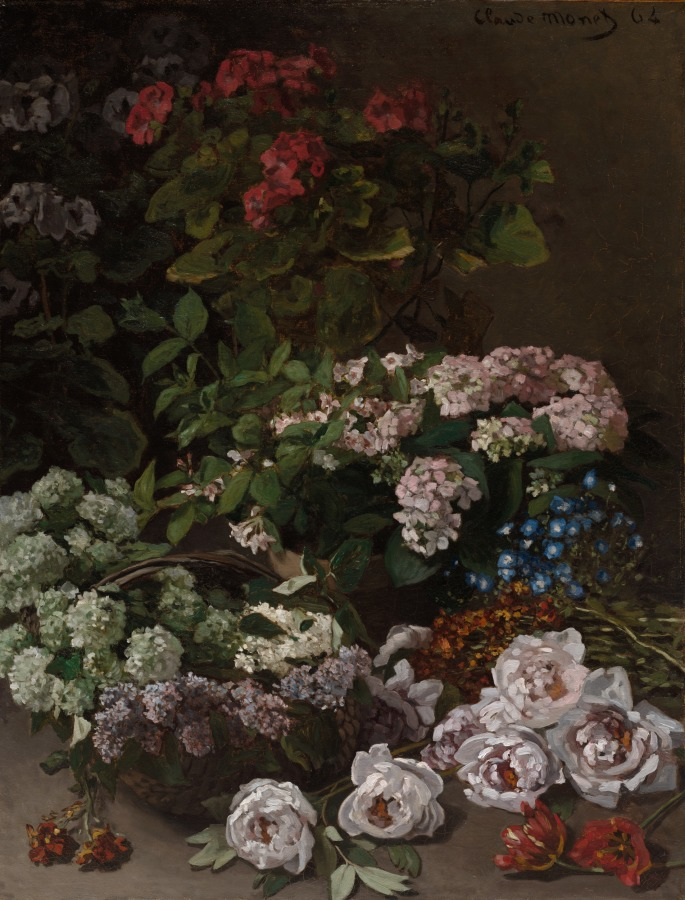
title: Spring Flowers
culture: France, 19th century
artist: Claude Monet (French, 1840–1926)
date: 1864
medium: oil on fabric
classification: Painting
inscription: Signed upper right corner: Monet 64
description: This early work reveal's Monet's fascination with capturing the transitory effects that became the primary focus of his later innovations. Painted with almost scientific accuracy, this still life has a freshness and immediacy derived partly from its composition. Isolated against a dark background, the fully mature peonies, potted hydrangeas, and basketed lilacs spill downward and outward from the geraniums at the rear. At the same time, Monet's energetic brushwork conveys the sparkling play of light on leaves and petals.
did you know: Monet is quoted as saying, "I perhaps owe having become a painter to flowers." He painted this work in 1864, the first productive year of his career.